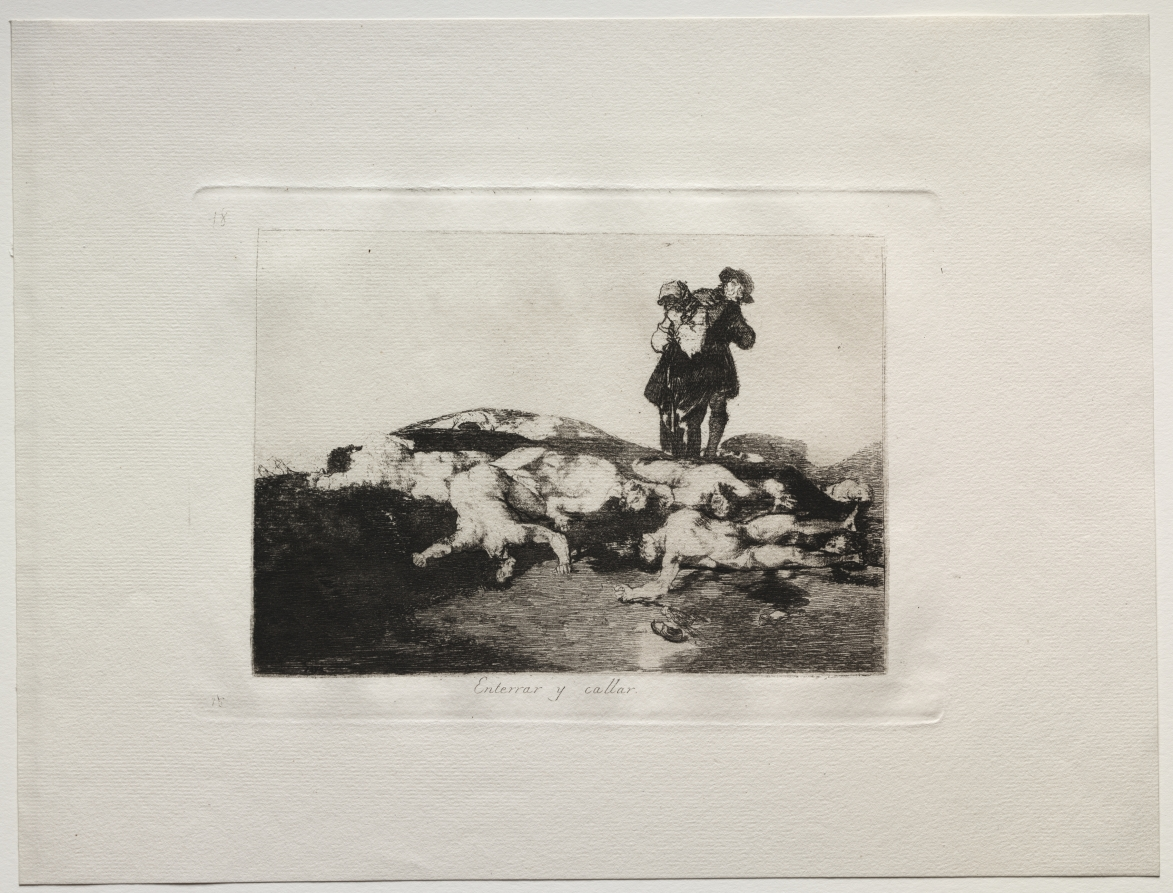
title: The Horrors of War: Bury Them and Keep Quiet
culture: Spain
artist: Francisco de Goya (Spanish, 1746–1828)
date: 1810–20, published 1863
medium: etching and aquatint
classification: Print